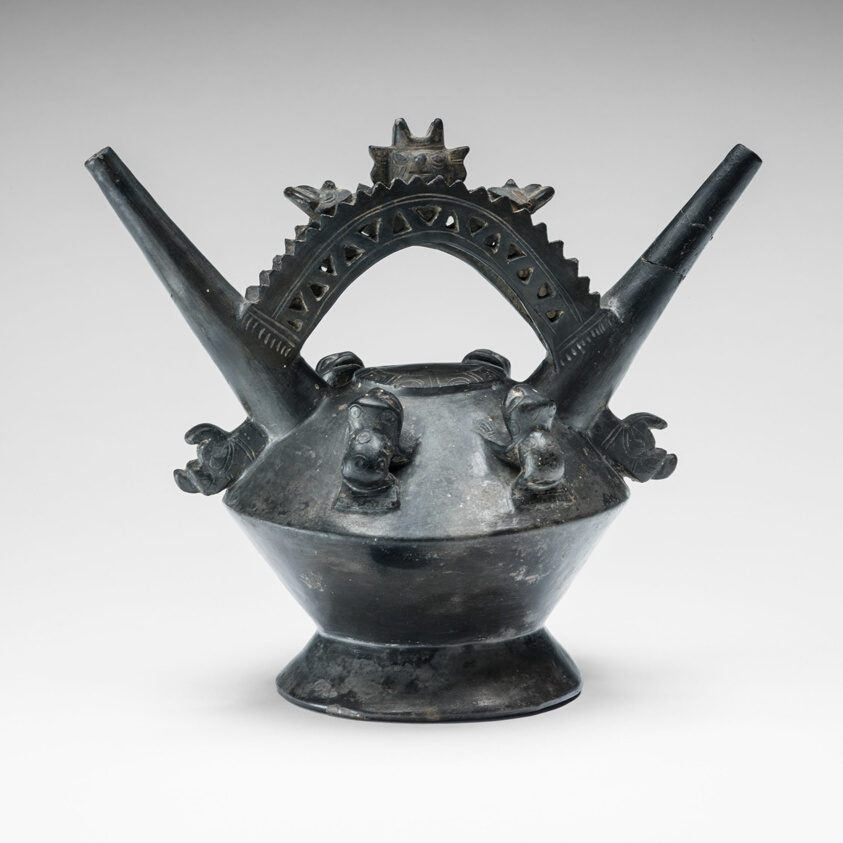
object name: Vessel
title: Vessel with Double-Horned Spouts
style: lambayeque, late intermediate period, Pre-Columbian, americas, andes, Arts of the Americas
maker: Lambayeque (North coast, Peru)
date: 1000–1470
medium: Ceramic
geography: Peruvian North Coast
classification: earthenware; ceramics; vessel; art of the americas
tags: abstract figures, animals, masks, frog